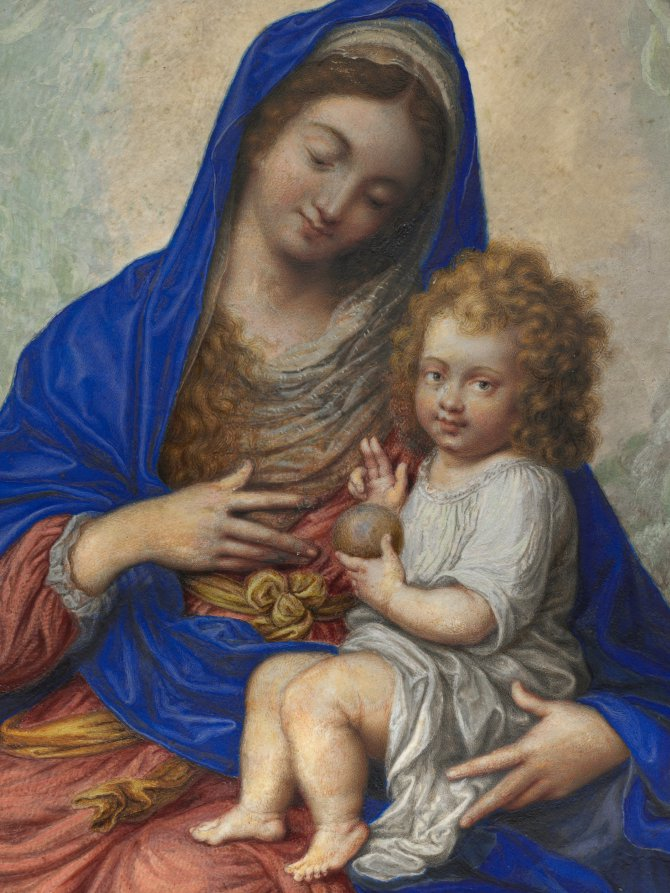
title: Madonna and Child in Glory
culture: England, 17th century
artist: Isaac Oliver (French, c. 1565–1617)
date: c. 1605–1617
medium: gouache and watercolor, heightened with gum arabic, with shell gold framing lines, on vellum, mounted on paper, vellum, and wood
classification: Portrait Miniature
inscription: signed with monogram in gold, lower right: "IO"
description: It is difficult to overstate the singularity of this work in 17th-century England. While the image has visual sources in works by Rubens and Federico Barocci, surely known to the cosmopolitan artist (who travelled to Italy, unusually for English artists at this moment), the object is iconographically unique. Oliver places a tender Virgin and Child (itself more closely linked to Catholic instead of Protestant imagery), in a heavenly, visionary setting, and incorporates the medieval iconography of the lactating Virgin with the Salvator Mundi, early Netherlandish in origin, but more commonly an Italian typology by the early seventeenth century.